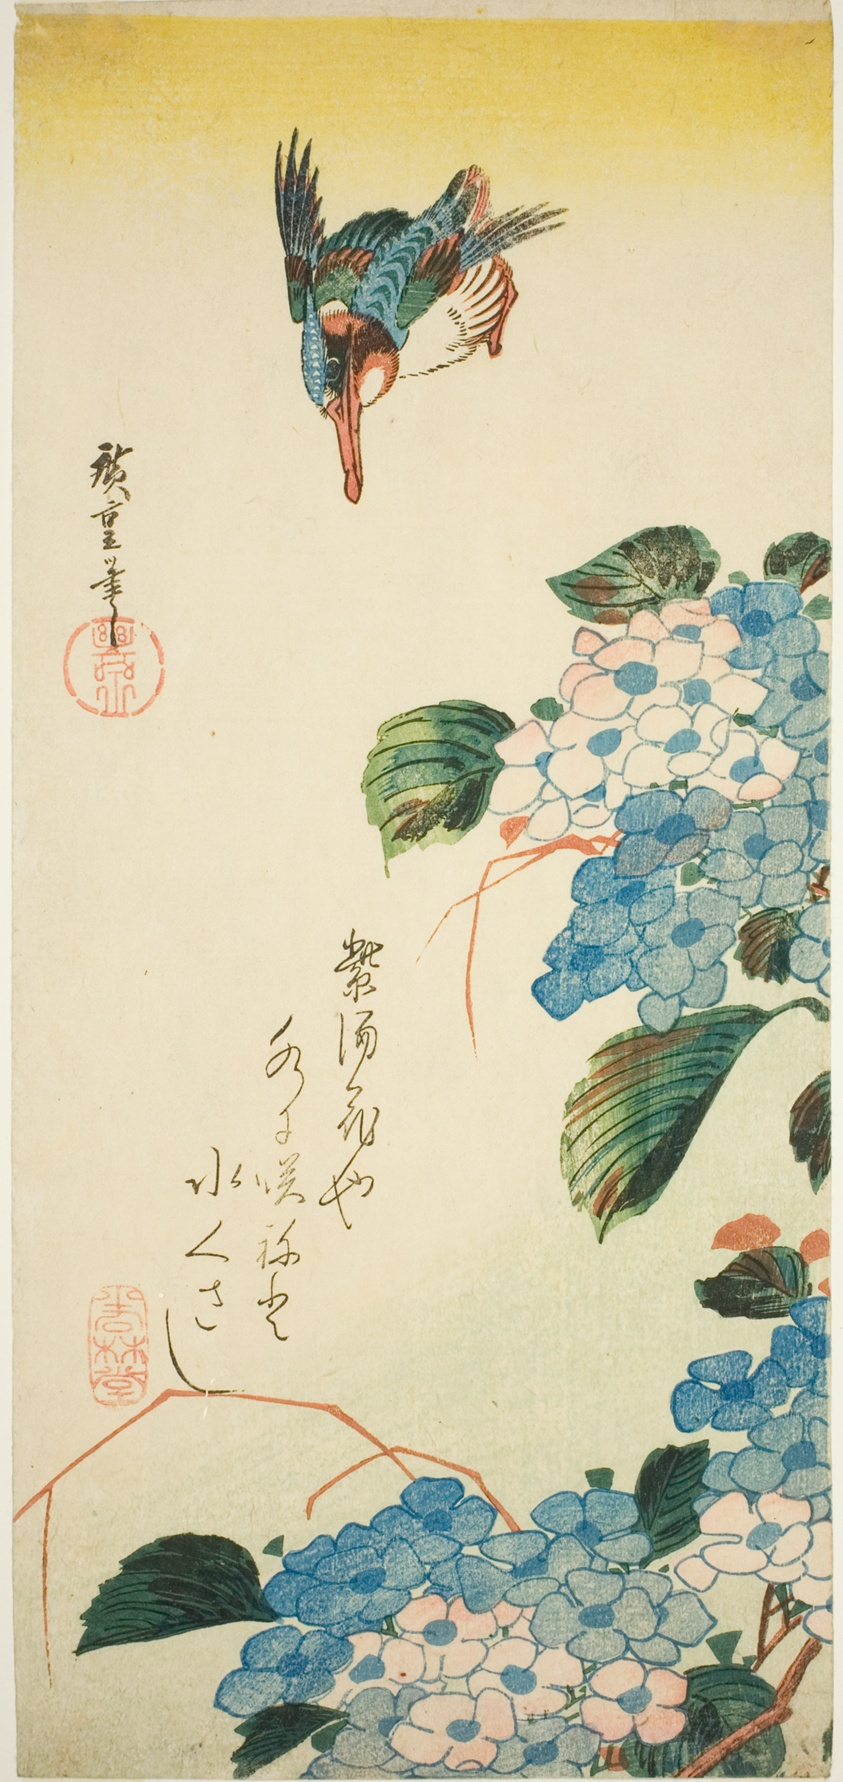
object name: Print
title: Kingfisher and hydrangea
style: Japanese (culture or style)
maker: Utagawa Hiroshige 歌川 広重; Japanese, 1797-1858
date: 1830s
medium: Color woodblock print; otanzaku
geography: Japan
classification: woodblock print; print; asian art